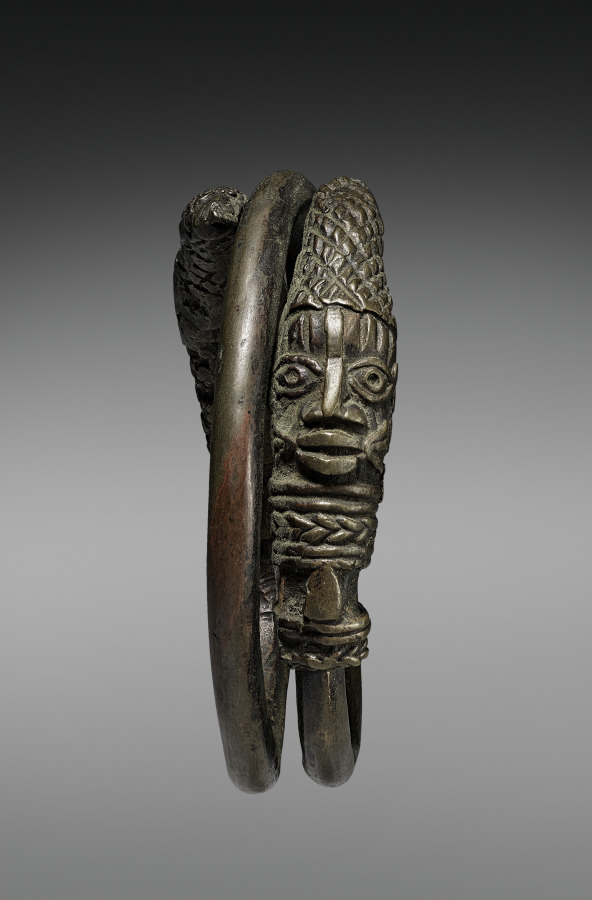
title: Hand Coil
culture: Nigeria, Benin Kingdom, Ẹdo peoples, members of the Igun Eronmwon (royal brasscasters) guild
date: 1800s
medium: Copper alloy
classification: Implements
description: While this looks like a bracelet, it wasn’t worn around a wrist. A chief or titleholder grasped this “hand coil” vertically during the annual Iguẹ festival, during which such men reaffirm their relationship to the Ọba, whose mystical powers are strengthened. An image of a man’s head caps each end of the thick, twisted metal. Repeated human touch rubbed the undecorated lengths bright and shiny. Though small, the coil’s detail is enormous: to capture it, the artist incised the designs in wax during the casting process. They show these men are elites, with necklaces, caps, and whisker-like facial markings.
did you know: This is a unique object; it was made using the lost-wax casting technique, which destroys the wax mold in the creation process.